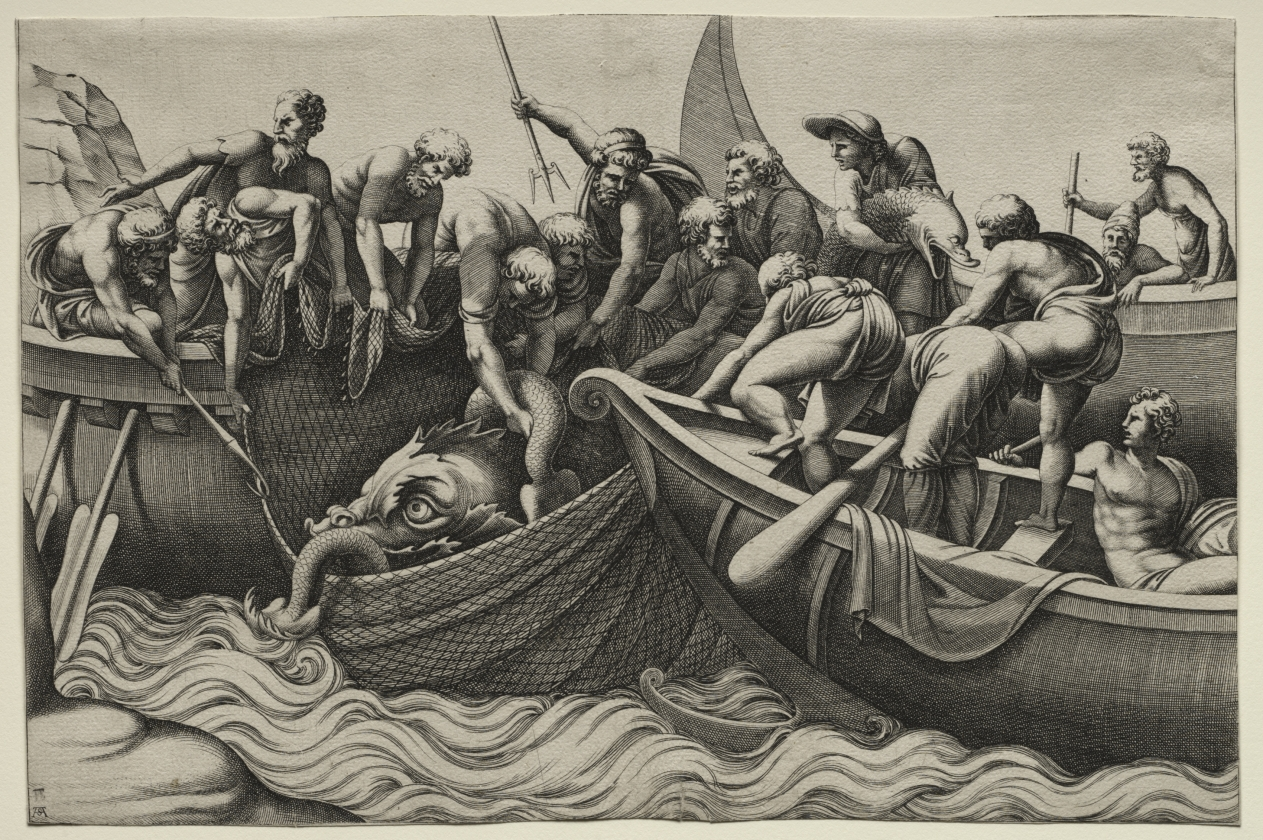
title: The Haul of Monstrous Fish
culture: Italy, 16th century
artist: Adamo Scultori (Italian, c. 1530–1585)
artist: after Giulio Romano (Italian, 1492/99–1546)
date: mid-1500s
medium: engraving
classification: Print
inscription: lower right, in plate: AS[in monogram] ; VERSO, center left, in graphite: Z 4½ ; lower left, in graphite: GM fe[? crossed out] / [omtohol-gshos?] ; lower left, in graphite: N. rfw[underlined] / très belle Ep. ; lower left, in graphite: XV.429.106. a Ghisi / du Cab. Durand ; lower left, in graphite: R 1098 P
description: Adamo belonged to a prominent family of printmakers in Mantua. This engraving is based on a preparatory drawing by Giulio Romano that relates to a fresco he painted in 1527 in the Sala dei Venti (Room of the Winds) in the Palazzo del Tè in Mantua.